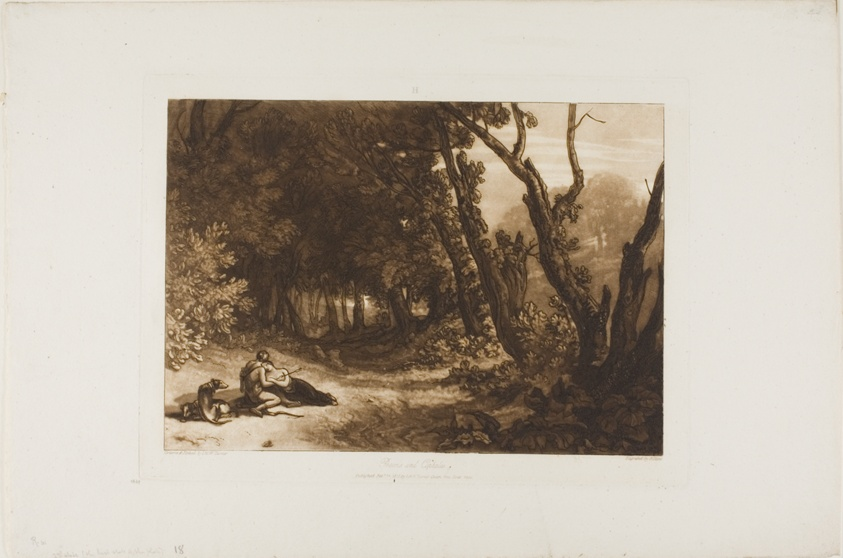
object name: Print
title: Procris and Cephalus, plate 41 from Liber Studiorum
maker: Joseph Mallord William Turner (English, 1775-1851); Engraved by G. Clint (1770-1854)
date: published February 14, 1812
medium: Etching and engraving in brown on off-white wove paper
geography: England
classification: mezzotint; print; prints and drawing